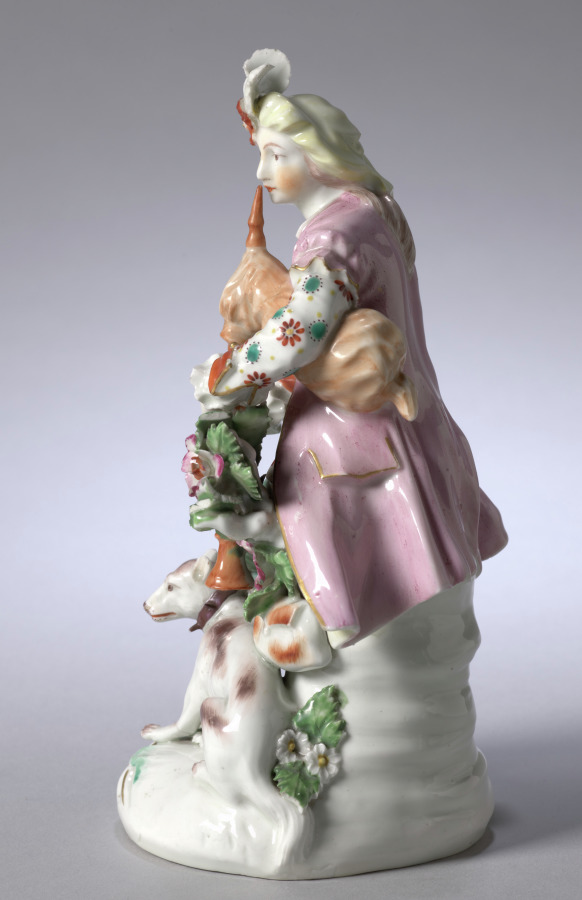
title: Seated Musician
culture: England, Derby, 18th century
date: c. 1765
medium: soft-paste porcelain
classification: Ceramic